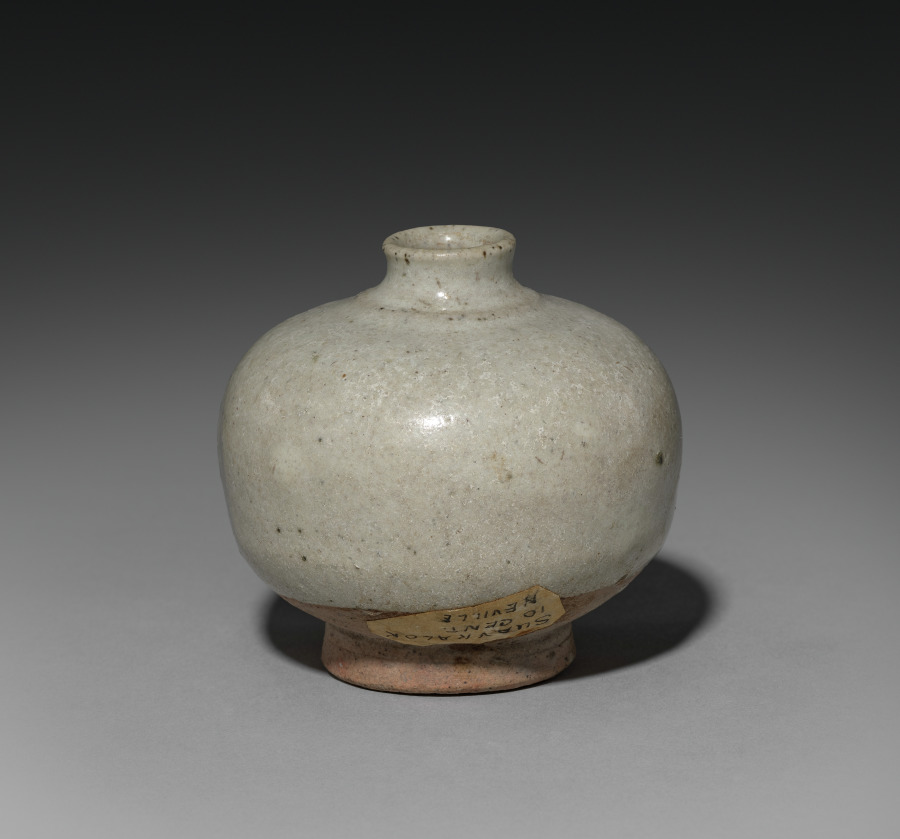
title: Bottle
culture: Siam, Sawankhalok ware, late 13th-14th Century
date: late 1200s-1300s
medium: stoneware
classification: Ceramic